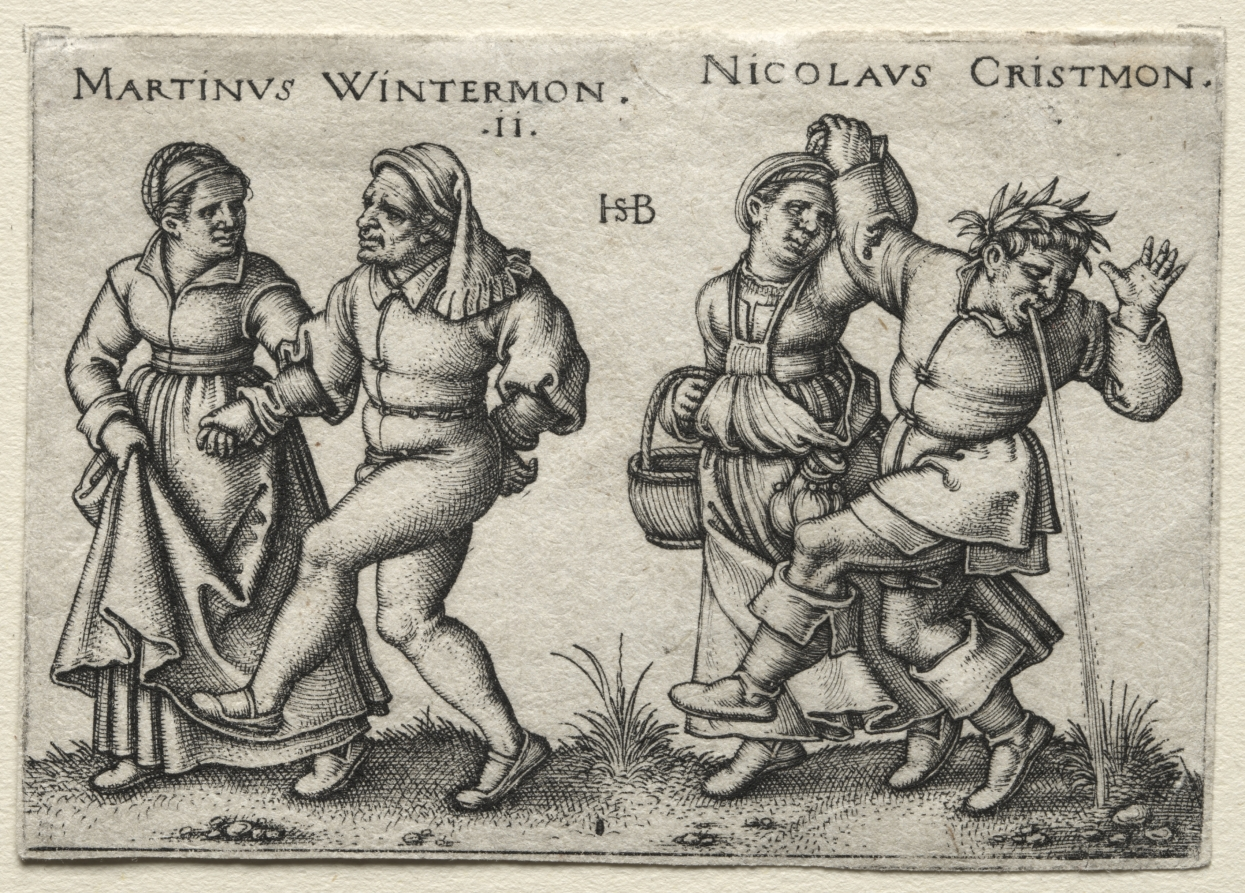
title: The Village Wedding: Martinus Wintermon / Nicolaus Cristmon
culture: Germany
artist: Hans Sebald Beham (German, 1500–1550)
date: 1546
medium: engraving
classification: Print